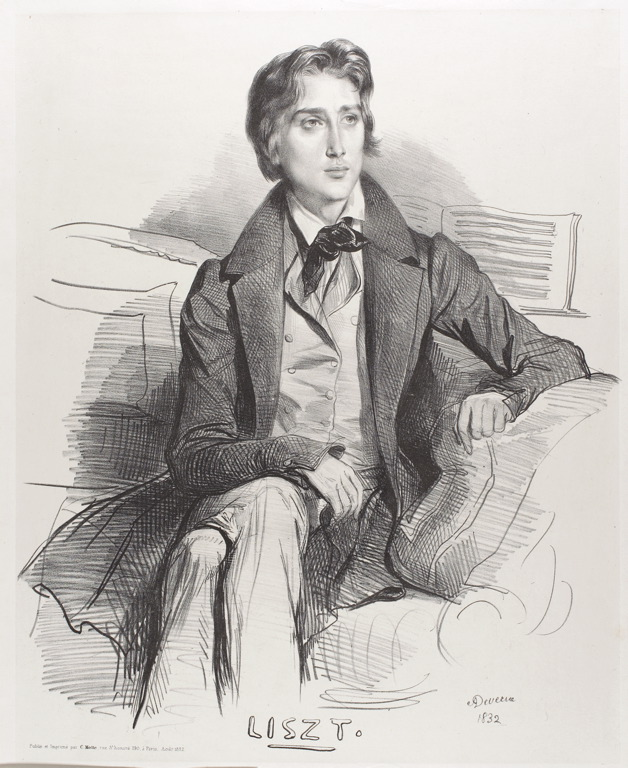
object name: Print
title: Portrait of Franz Liszt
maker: Achille Devéria (French, 1800-1857); published and printed by Charles Motte (French, 1785-1836)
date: published August 1832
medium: Lithograph on ivory China paper laid down with chine collé on white wove paper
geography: France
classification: lithograph; print; prints and drawing